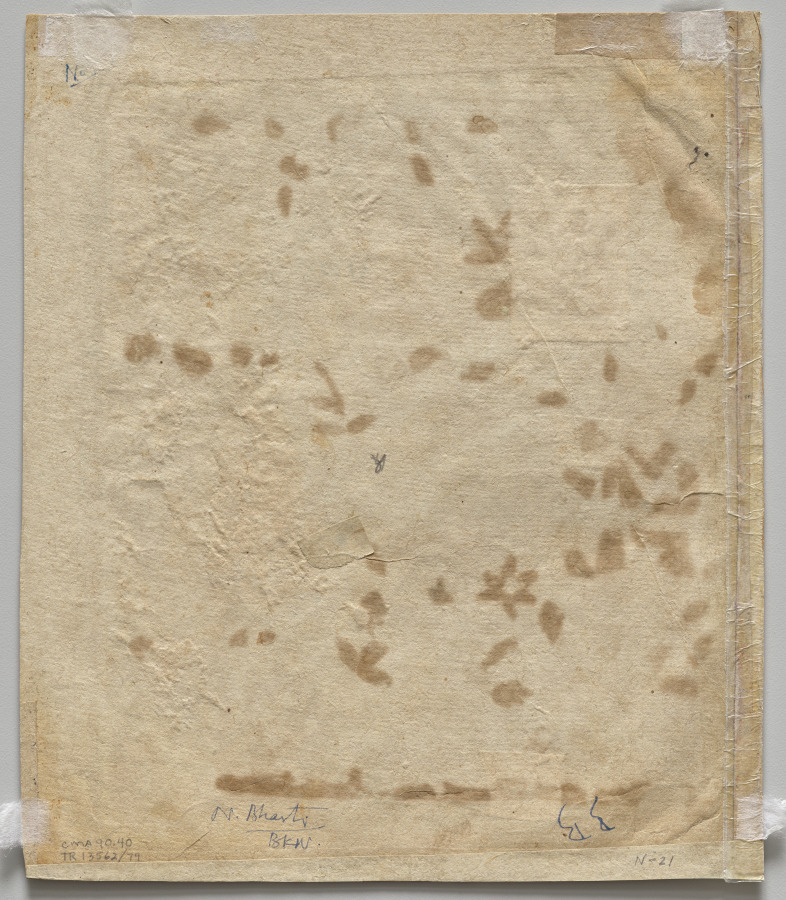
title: Sacrificial Fire, from the "Tula Ram" Bhagavata Purana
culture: Western India, Gujarat, Surat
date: c. 1720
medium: Gum tempera, ink, and gold on paper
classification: Painting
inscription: jagya karau hau kaṃsu bāsudevajī ke bāha ke nīvīta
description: The evil king Kamsa organized a fire sacrifice in order to bring about the death of his brother-in-law, Vasudeva, father of the Hindu god incarnated as Krishna. The four-armed god of creation, Brahma, attends at the upper left with the sage, or holy man, Narada at the upper right. Scholars have linked the copious floral motifs throughout this dispersed series with textile patterns. This series was created in a port city, the center of flourishing international textile trade.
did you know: The sage Narada in the upper right corner plays a stringed instrument called a vina.